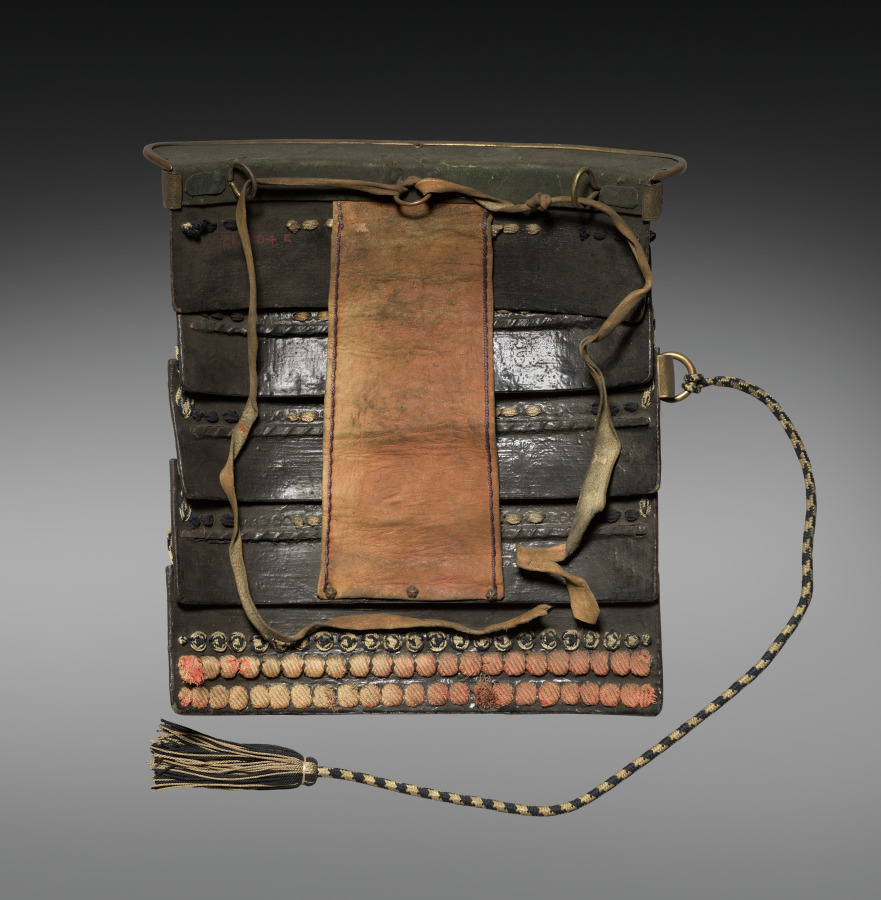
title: Shoulder Guard (Sode)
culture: Japan, Edo period (1615–1868)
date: 1600s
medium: Iron, lacquer, textile (silk)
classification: Arms and Armor